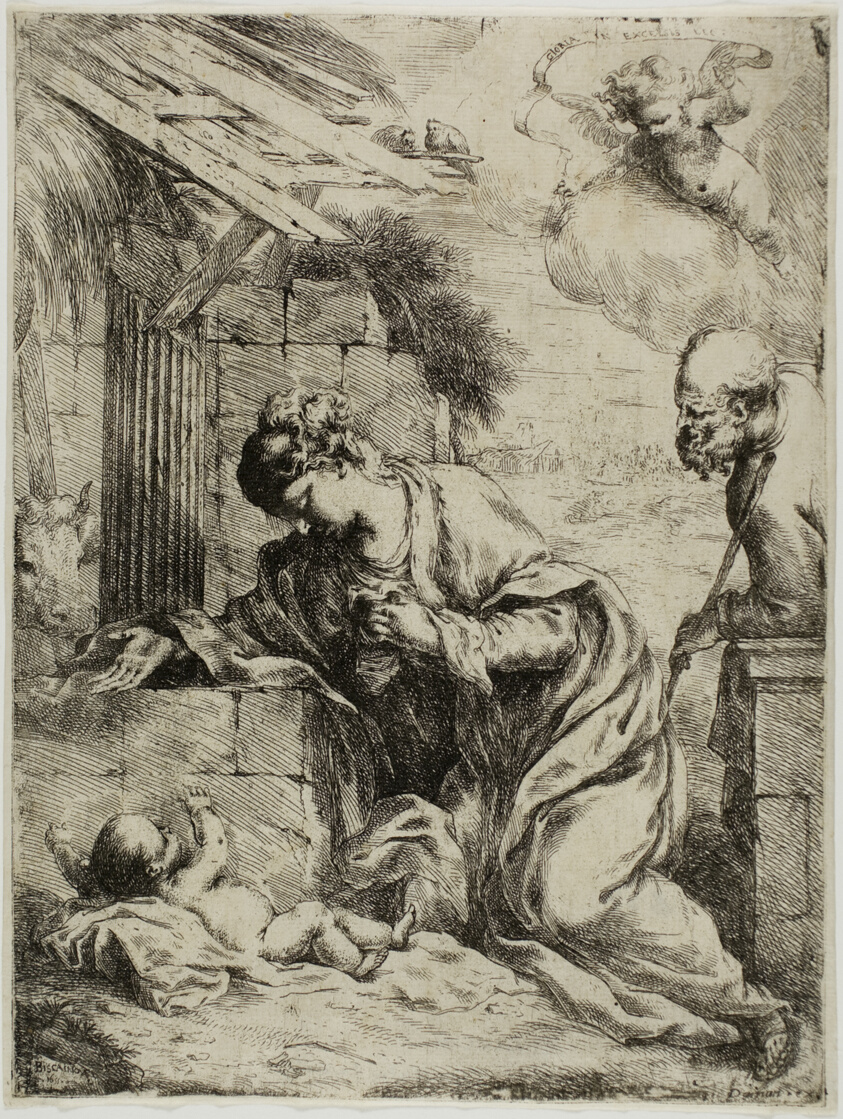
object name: Print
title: The Virgin Adoring the Infant Jesus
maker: Bartolomeo Biscaino (Italian, 1632-1657)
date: 1655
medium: Etching on paper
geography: Italy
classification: etching; print; prints and drawing